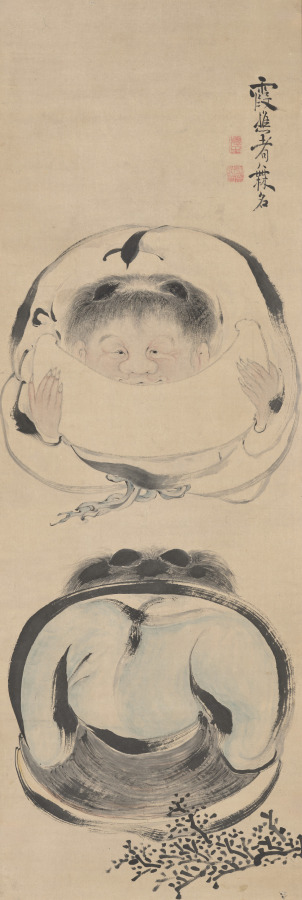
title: Hanshan and Shide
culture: Japan, Edo period (1615–1868)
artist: Ike Taiga (Japanese, 1723–1776)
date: c. 1745–76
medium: hanging scroll; ink and light color on paper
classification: Painting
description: Hanshan and Shide are a pair of individuals associated with Chan, or Zen, Buddhism who lived on Mount Tiantai in China around the 700s to early 800s. In Japan, their names are read Kanzan and Jittoku. Hanshan, whose name means “Cold Mountain,” was a monk-poet, shown reading out from a scroll of his poetry in this work. His close friend Shide, or “Foundling,” was a temple’s custodian. Here, Shide listens intently to Hanshan’s verses, his brush broom behind him.